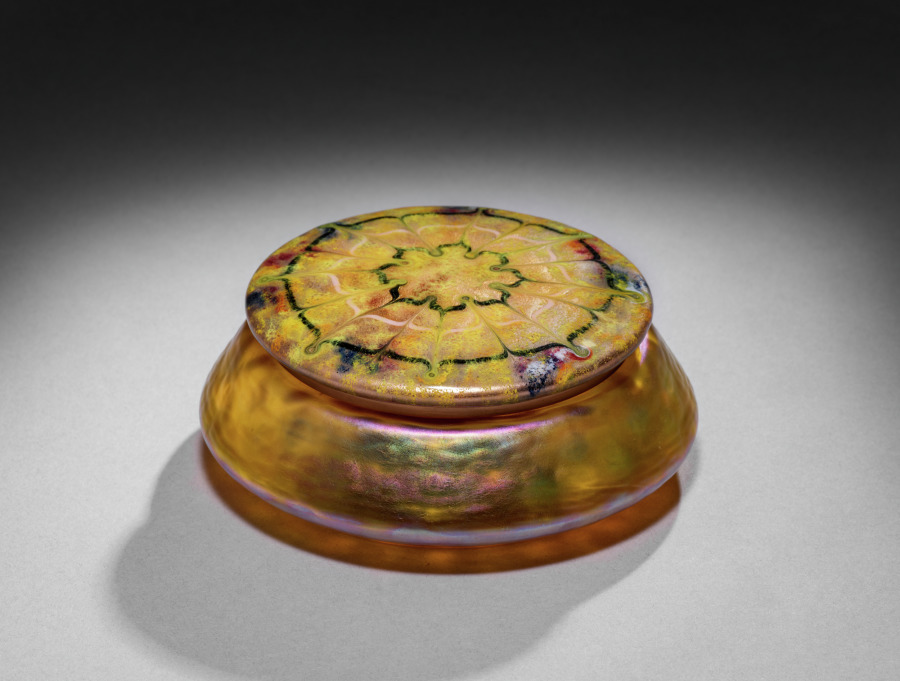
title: Covered Box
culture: America, New York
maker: Tiffany Glass & Decorating Company (America, New York, 1892–1902)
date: c. 1898–1902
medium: Favrile glass, enamel on copper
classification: Glass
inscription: Louis C. Tiffany Favrile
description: By 1900 Tiffany had expanded his empire by increasing the firm’s production of “fancy goods,” including inkstands, candlesticks, clocks, small boxes, desk sets, tea screens, and other functional objects. Along with the array of artistic glass designs from his factory in Corona, Queens, works in ceramic, bronze, other metals, and even jewelry abounded. These smaller, more affordable luxury items were designed with as much thought to artistry as the great stained glass windows and lamps through which the firm enjoyed unrivaled success.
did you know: This fanciful dressing table accessory likely contained dusting powder and a feather puff.